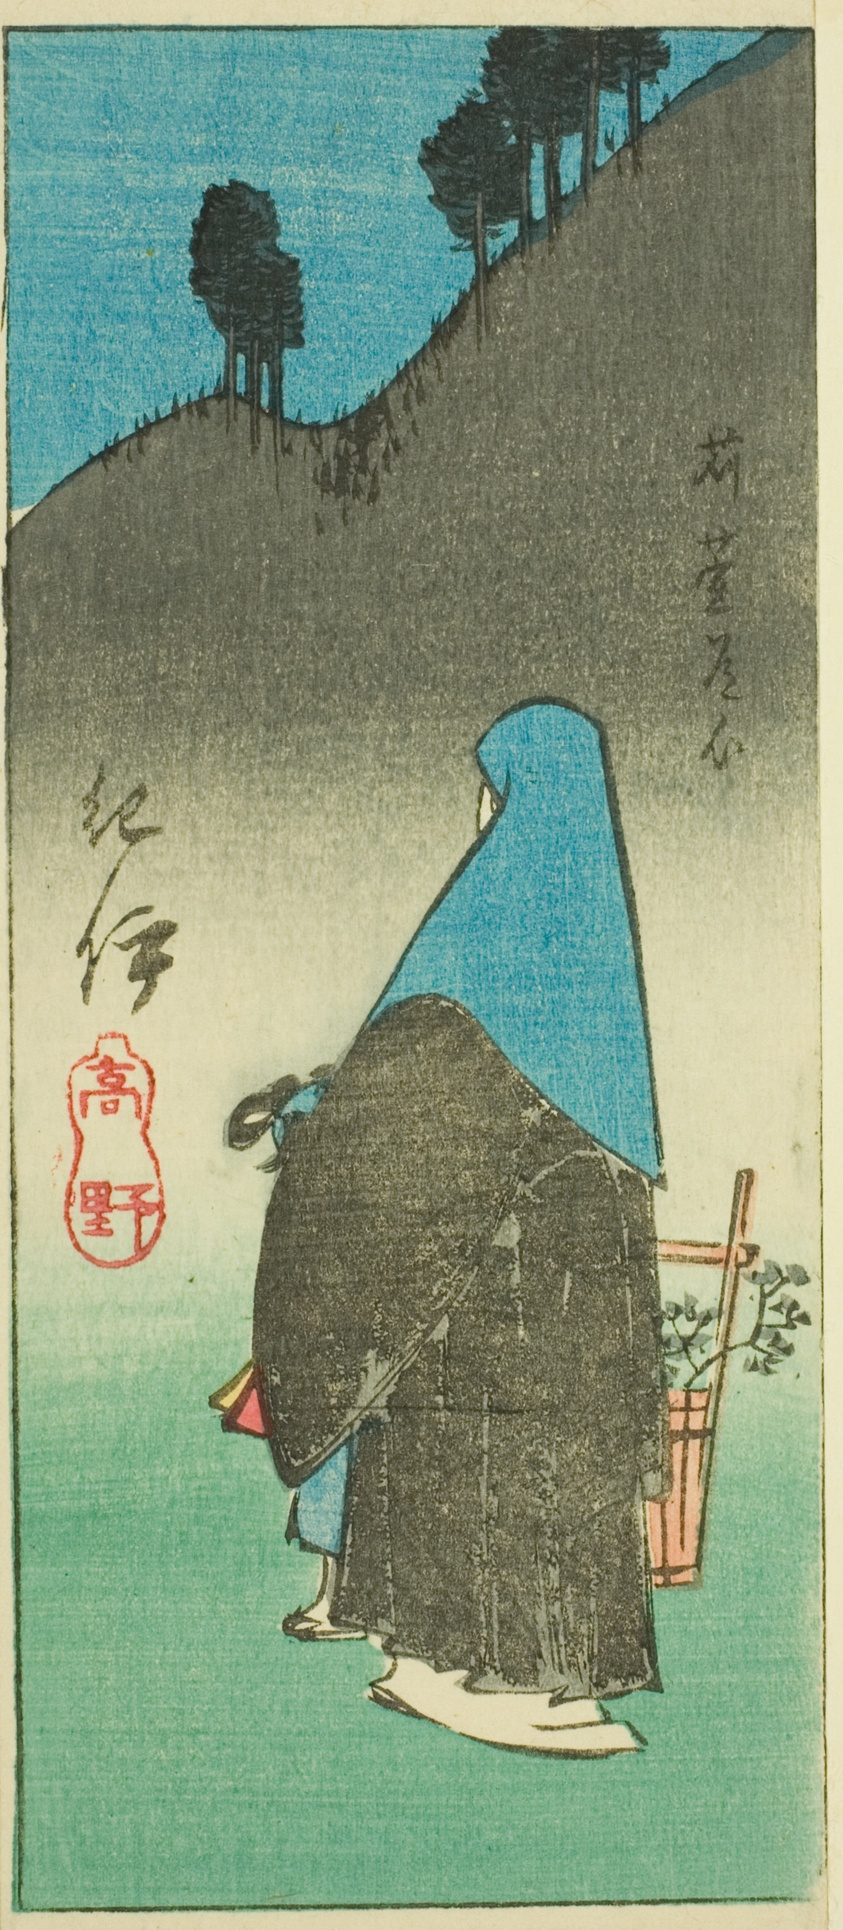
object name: Print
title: Mount Koya in Kii Province (Kii, Koya), section of sheet no. 16 from the series "Cutout Pictures of the Provinces (Kunizukushi harimaze zue)"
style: Japanese (culture or style)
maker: Utagawa Hiroshige 歌川 広重; Japanese, 1797-1858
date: 1852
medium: Color woodblock print; section of harimaze sheet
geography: Japan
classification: woodblock print; print; asian art